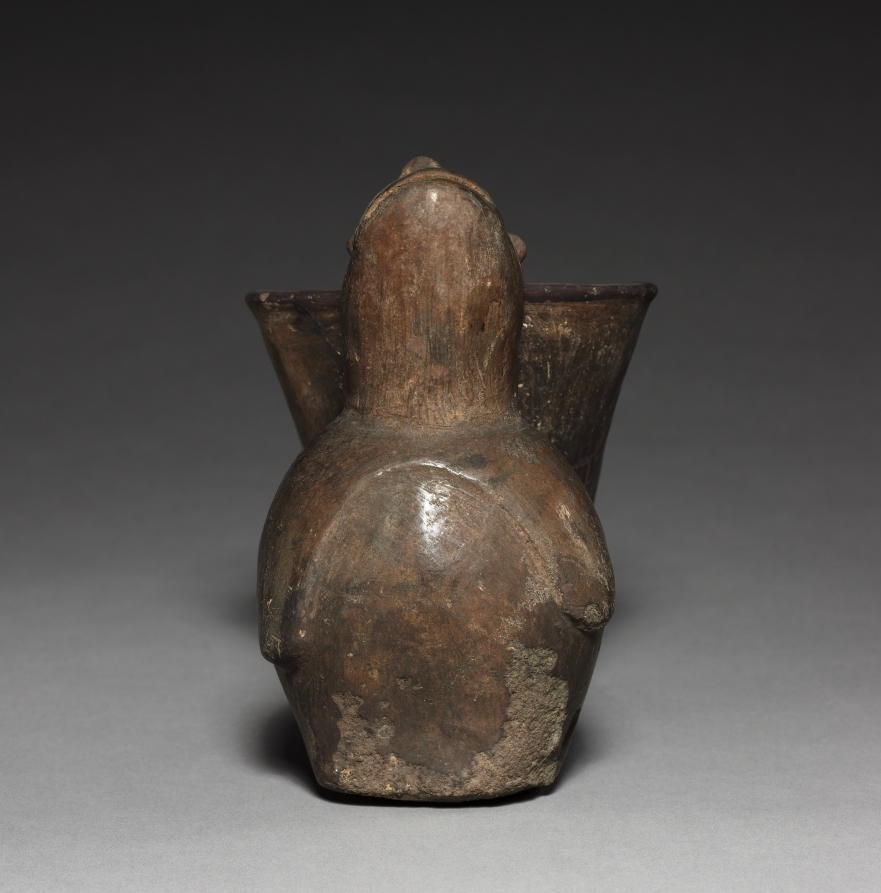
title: Vase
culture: Peru, Huacho Ware?, early 9th Century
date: c. 800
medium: black ware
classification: Ceramic